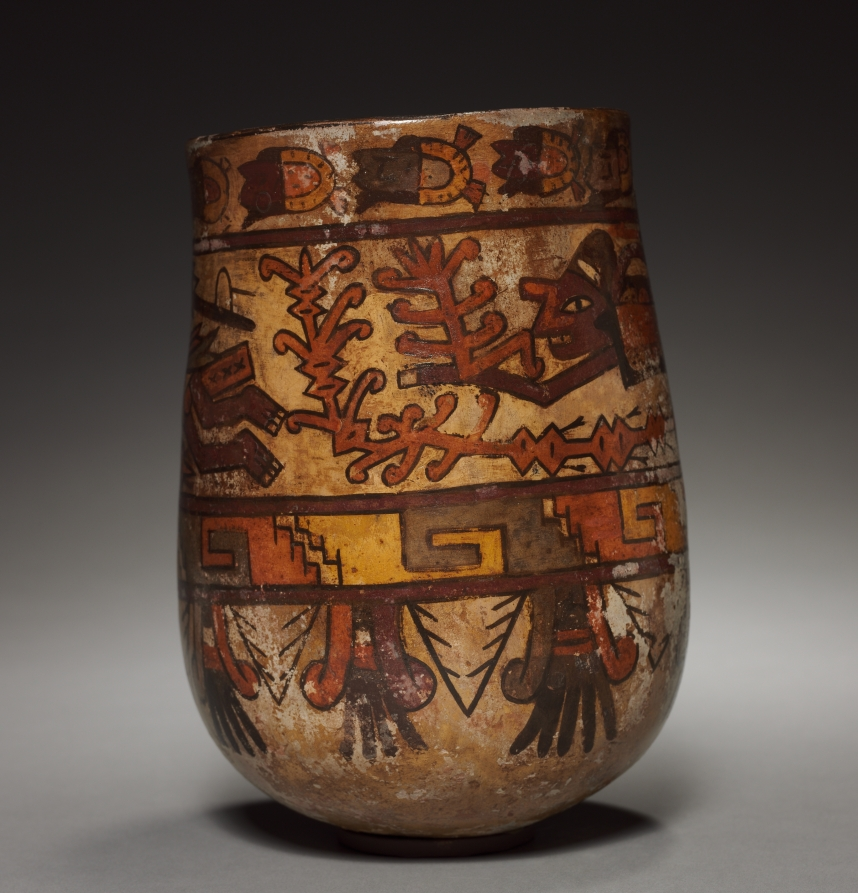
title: Vase with Trophy-heads and Warriors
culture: Peru, South Coast, Nasca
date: c. 450–600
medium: earthenware with colored slips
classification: Ceramic